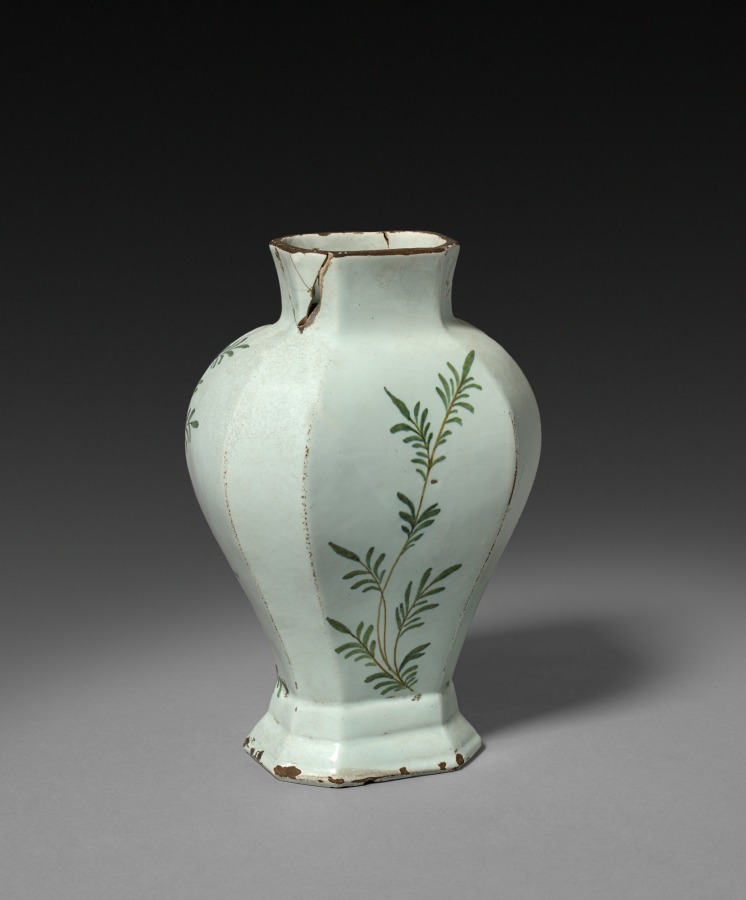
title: Vase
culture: Netherlands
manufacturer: probably by Het Bijltje Factory (Dutch)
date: mid 1700s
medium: delftware (tin glazed earthenware)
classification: Ceramic